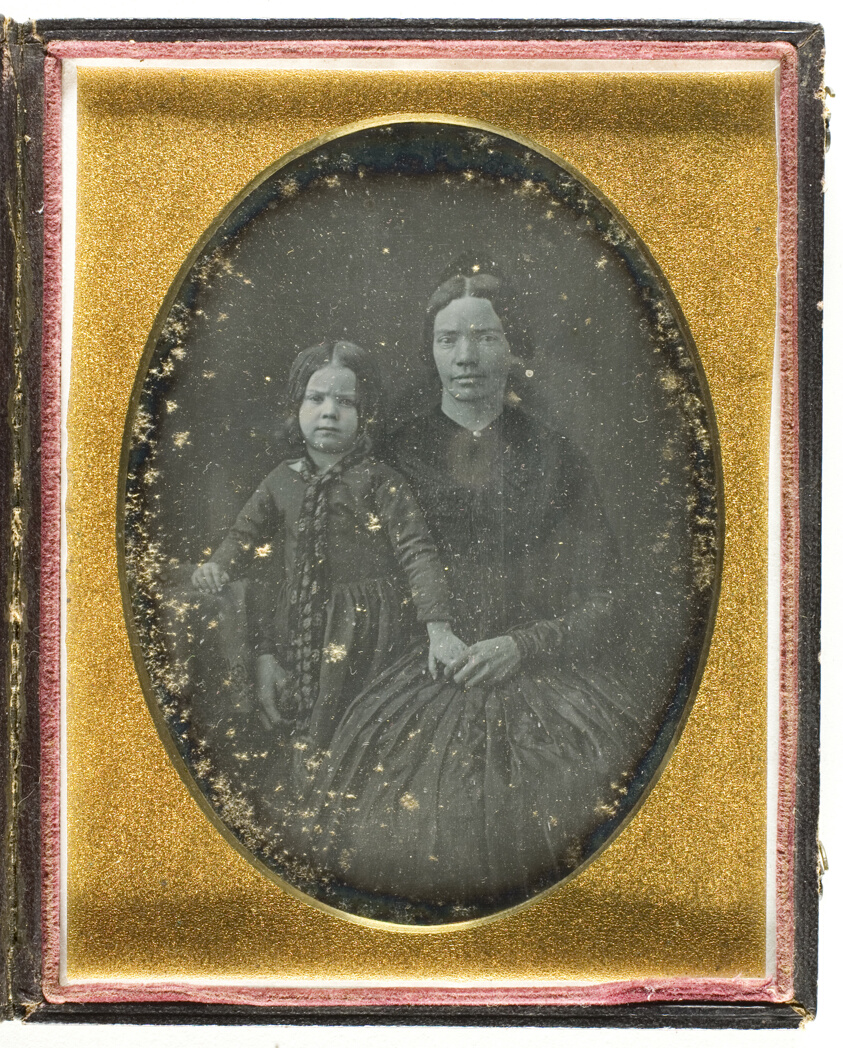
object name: Photograph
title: Untitled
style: 19th century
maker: Fontayne & Porter; American, active 1848–1856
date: 1848/56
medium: Daguerreotype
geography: United States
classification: daguerreotype; photographic process; photography; photograph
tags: portraits, portraits: female subject, photography, portraits: multiple subjects, formal portraits, portraits: child subject